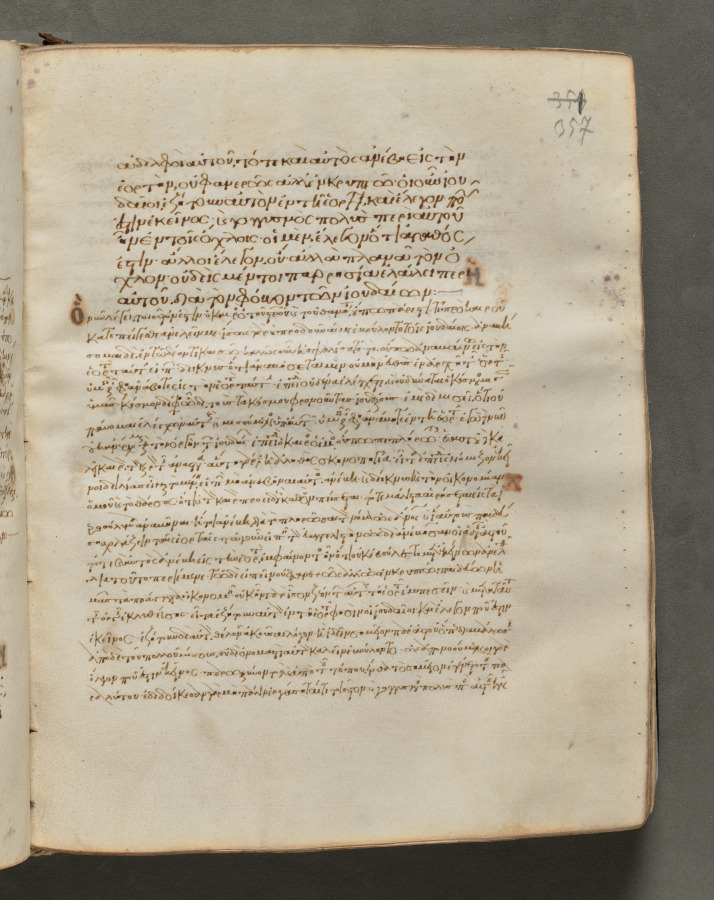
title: Text, folio 357 (recto), from a Gospel Book with Commentaries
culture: Byzantium, Constantinople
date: c. 1000–1100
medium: ink, tempera, and gold on vellum; leather binding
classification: Bound Volume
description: Each of the four gospels in this book opens on a page with brilliantly illuminated borders depicting the author of the text as well as birds—principally peacocks, symbols of the immortality of the soul—and fountains, representing the fountain of life and the salvation of the soul. This volume consists of 428 leaves with texts in Greek. Its level of sophistication suggests that it was probably written and decorated in a monastery in Constantinople.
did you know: Gospel books were carried in procession through Byzantine churches.